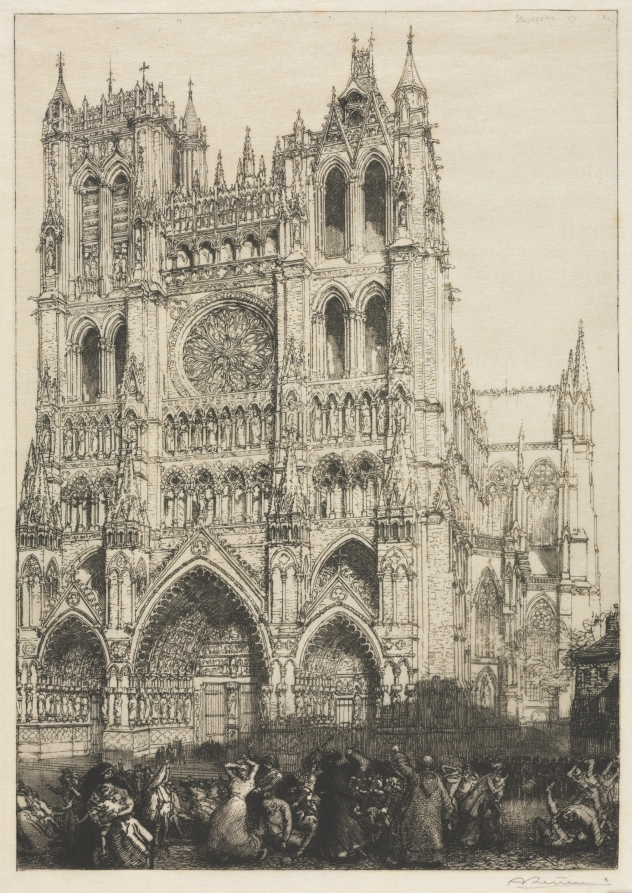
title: Amiens Cathedral, Inventory Day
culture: France, 19th century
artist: Auguste Louis Lepère (French, 1849–1918)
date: 1887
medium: etching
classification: Print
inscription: signed in pencil, lower right margin: A Lepere signed and dated upper right in plate: A Lepere-87